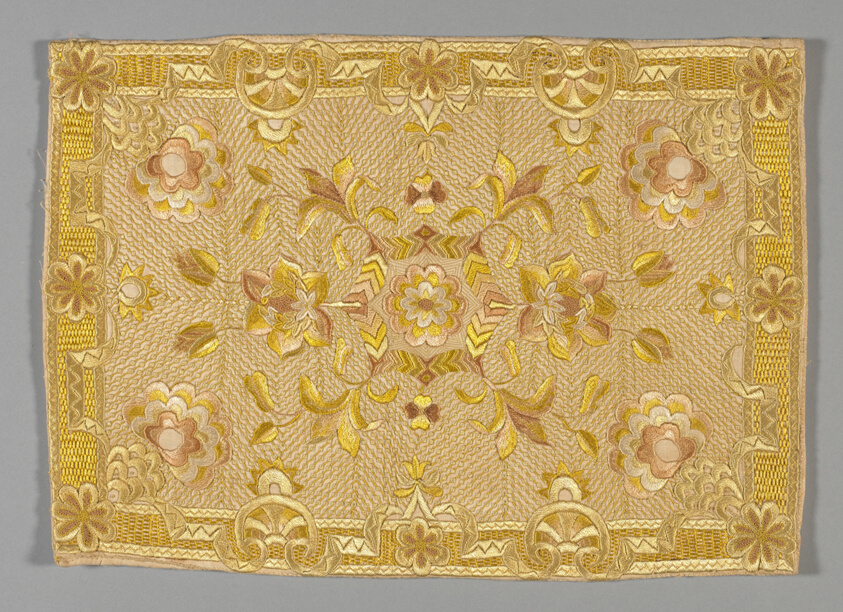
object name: Textile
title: Pillow Sham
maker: England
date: c.1720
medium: Cotton, plain weave; underlaid with linen, plain weave; embroidered with silk floss and silk yarns in herringbone, individual satin, satin, and stem stitches; laid work, couching, and French knots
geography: England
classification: textile; needlework (visual works)